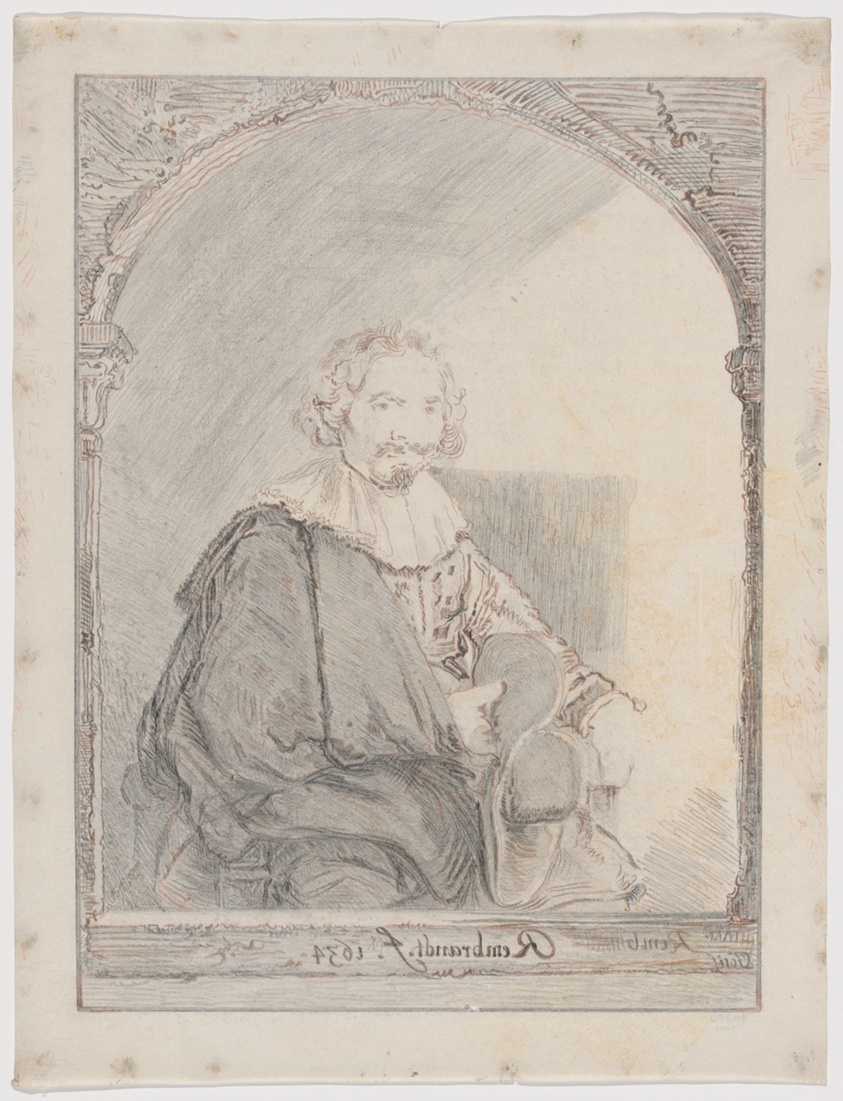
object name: Drawing and Watercolor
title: Study for Portrait of a Man in an Armchair, from Collection d'imitations de Dessins d'après les Principaux Maîtres Hollandais et Flamands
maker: Christian Josi (Dutch, died 1828); after Rembrandt van Rijn (Dutch, 1606-1669)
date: 1826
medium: Graphite and red chalk on light weight tracing paper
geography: Netherlands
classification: graphite; drawings (visual works); prints and drawing